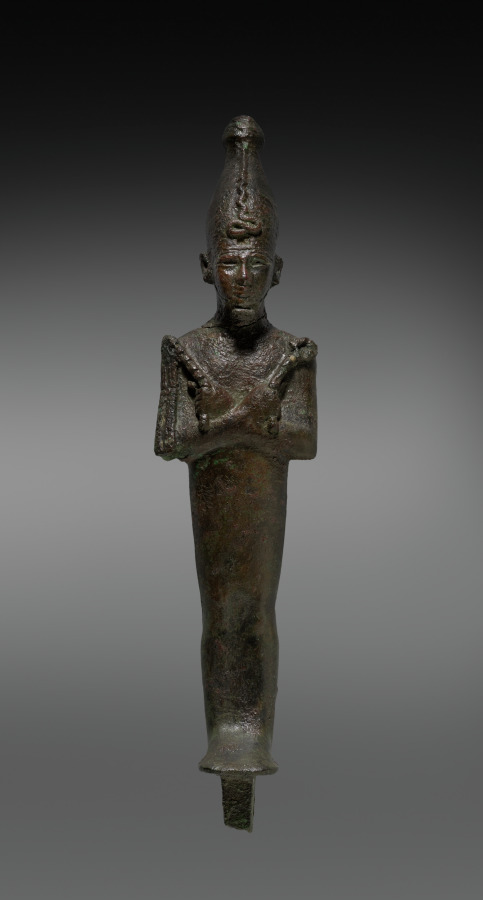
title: Statuette of Osiris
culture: Egypt, Late period (715–332 BCE), Dynasty 26 or later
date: 664–525 BCE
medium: black copper (?), hollow cast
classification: Sculpture